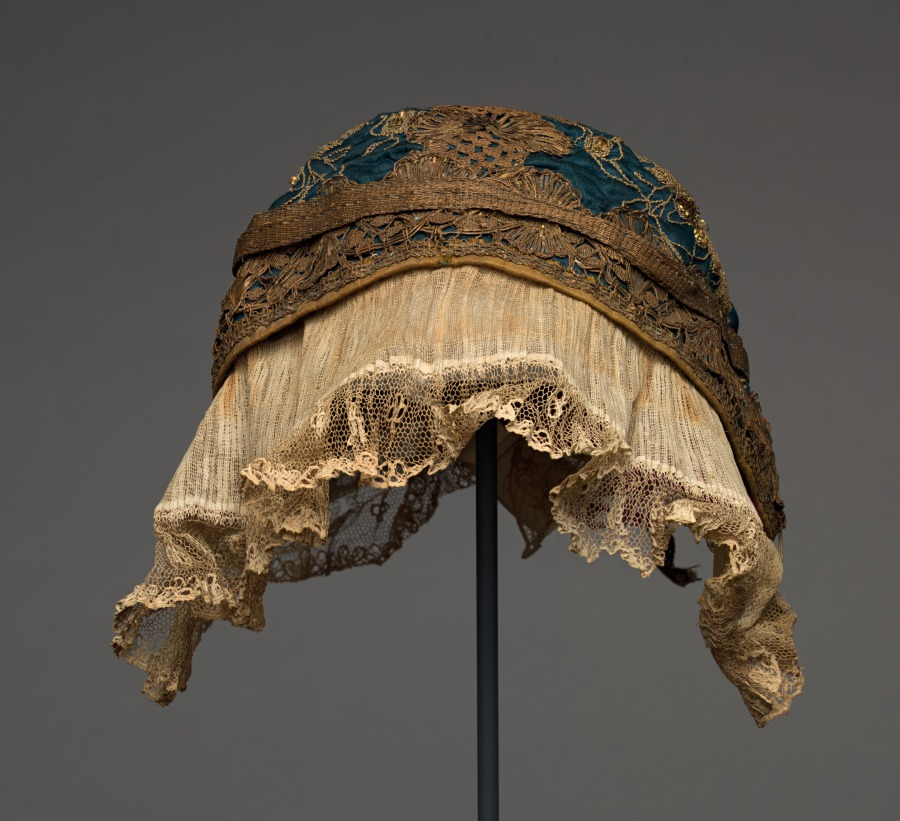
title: Embroidered Cap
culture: Germany, Mecklenburg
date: 1700s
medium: embroidery; satin ground embroidered with gold thread and decorated with gold lace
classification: Garment